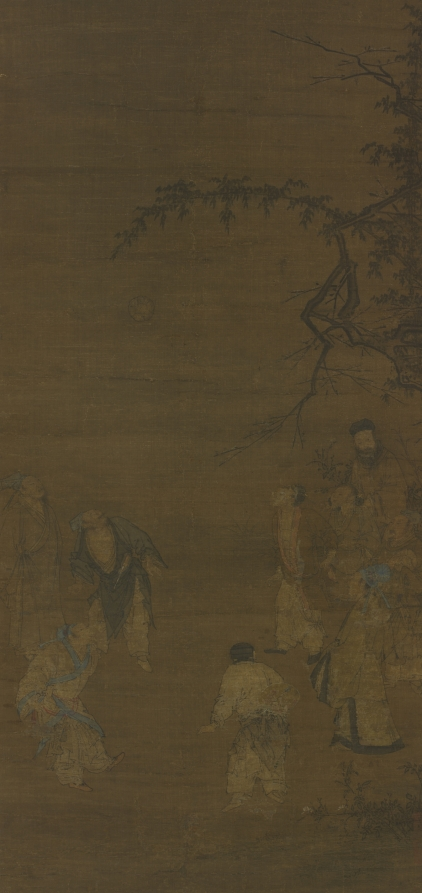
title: The Football Players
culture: China, Southern Song dynasty (1127-1279)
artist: attributed to Ma Yuan (Chinese, c. 1150–after 1255)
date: c. late 1100s–1st quarter 1200s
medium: Hanging scroll; ink and light color on silk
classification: Painting